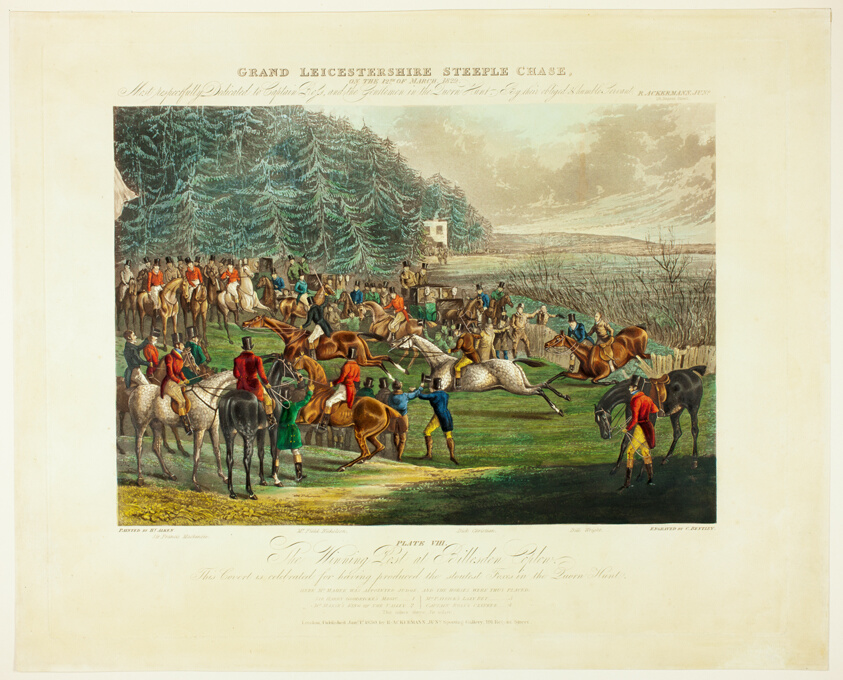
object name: Print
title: The Winning Post, from The Grand Steeplechase over Leicestershire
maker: Charles Bentley (English, 1806-1854); after Henry Alken (English, 1785-1851); published by R.A. Ackermann (English, 1764-1834)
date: published 1830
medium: Color aquatint on paper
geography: England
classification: aquatint; print; prints and drawing